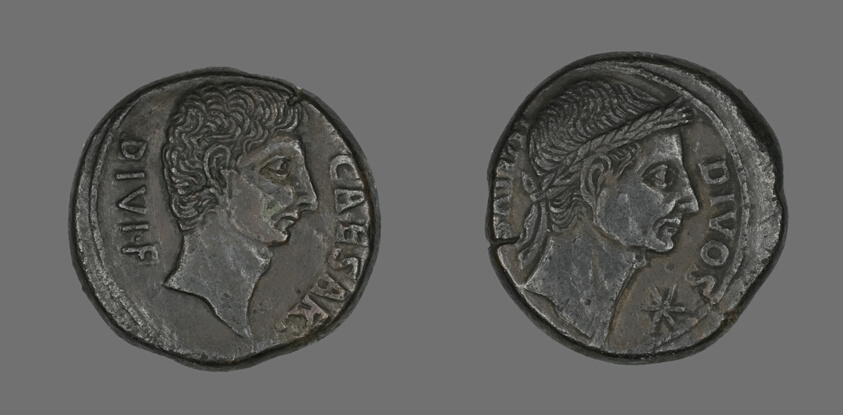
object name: Coin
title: Coin Portraying Julius Caesar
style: roman (ancient, style or period), ancient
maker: Roman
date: about 38 BCE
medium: Bronze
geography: Roman Empire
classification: coin; struck; ancient art